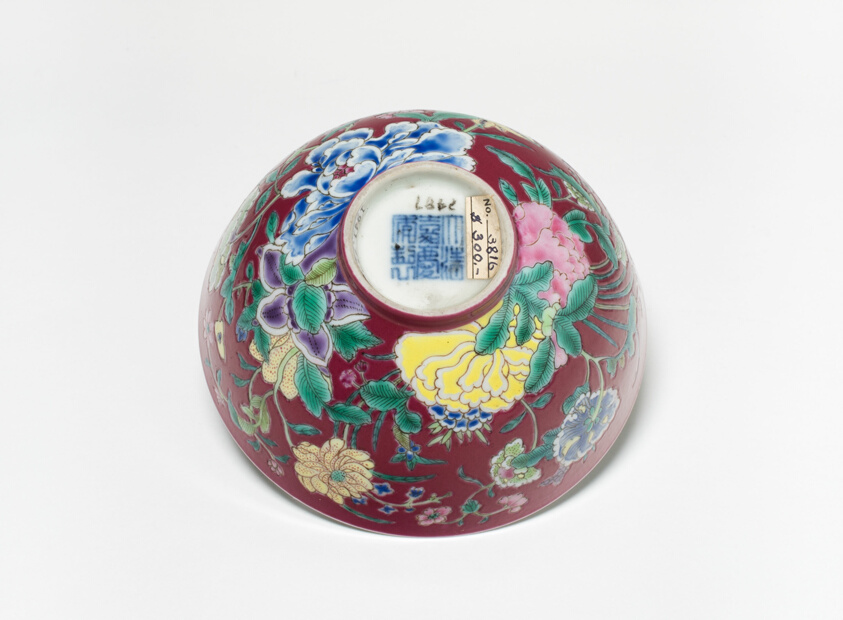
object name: Vessel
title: Bowl with Peonies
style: Chinese (culture or style)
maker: China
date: Qing dynasty (1644–1911), Jiaqing period (1796–1821)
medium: Porcelain painted in overglaze enamels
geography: China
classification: bowl; porcelain; dish (vessel); ceramics; asian art; vessel